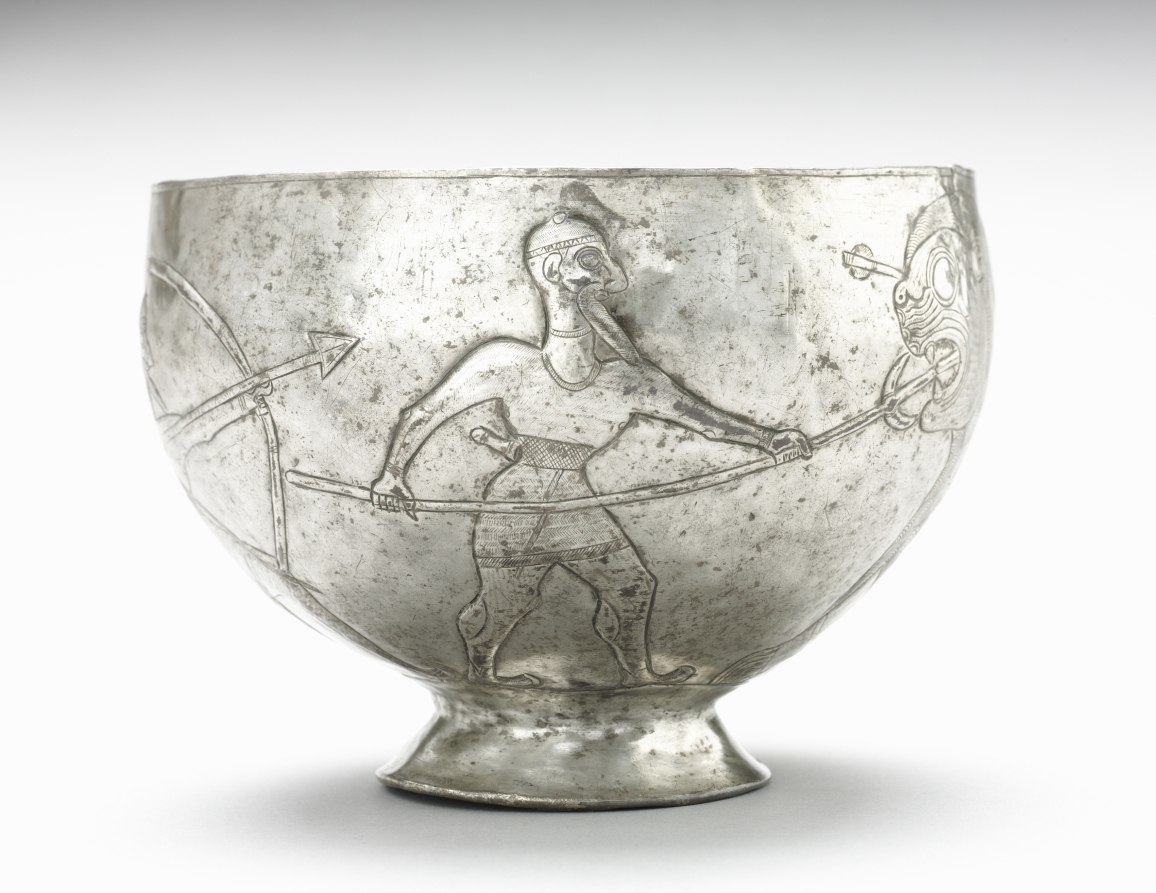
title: Lion Hunting Cup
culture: Iran, Amlash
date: 1100–1000 BCE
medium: silver, raised, chased, repoussé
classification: Metalwork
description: The nomadic gold- and silversmiths of Marlik and Amlash were the first masters of precious metalwork in Iran. Their successors were the bronze workers of Luristan and the silversmiths of the Achaemenian and Sasanian empires.